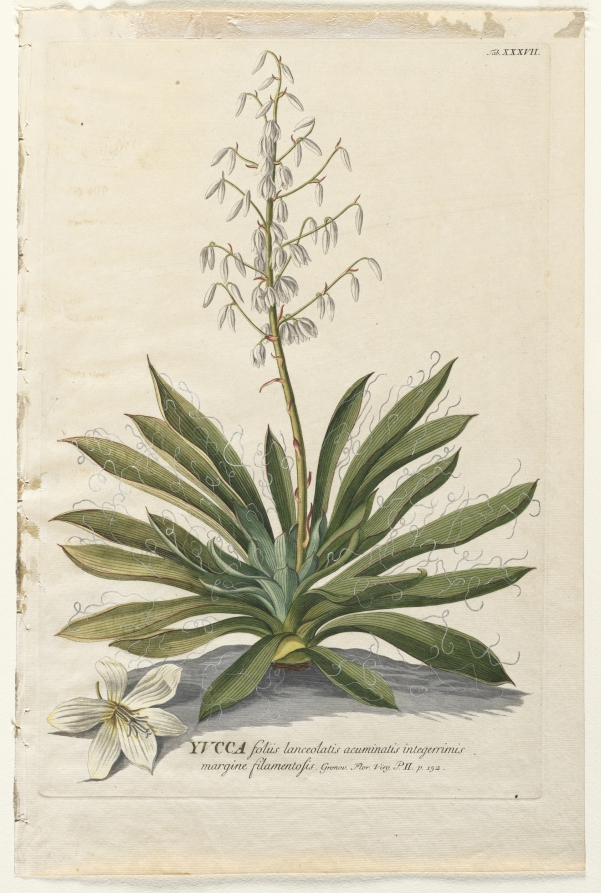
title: Plantae Selectae: No. 37 - Yucca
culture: Germany, 18th century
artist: Georg Dionysius Ehret (German, 1708–1770)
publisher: Christopher Jacob Trew (German, 1695–1769)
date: published 1750–73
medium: engraving, hand-colored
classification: Print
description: A major problem in horticulture was the lack of a consistent system of classification. The first successful attempt to establish a common nomenclature was in 1724 when 20 London nurserymen published a list of all plants grown in their nurseries. Swedish botanist Carolus Linnaeus’s Systema Naturae was published in 1735; it classified 7,700 plants by their botanic structure and gave them universally applicable two-part Latin names. From then on artists had to combine scientific accuracy with artistic skill. Many of Ehret’s flower portraits were copied by printmakers and published in the great botanical iconographies of his day. His patron Dr. Christoph Jakob Trew engaged the Haids, a distinguished family of Nuremberg etchers, to translate Ehret’s crisp, vigorously drawn paintings into printed illustrations.